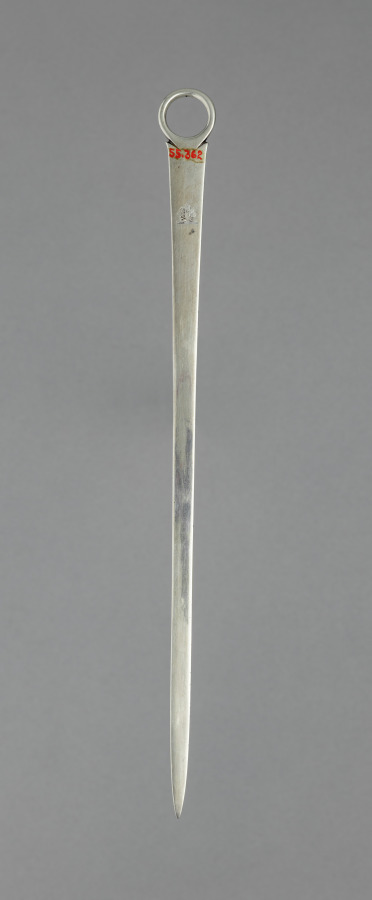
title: Skewer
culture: England, 18th century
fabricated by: Hester Bateman (British, 1709–1794)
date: 1783–1784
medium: silver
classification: Silver